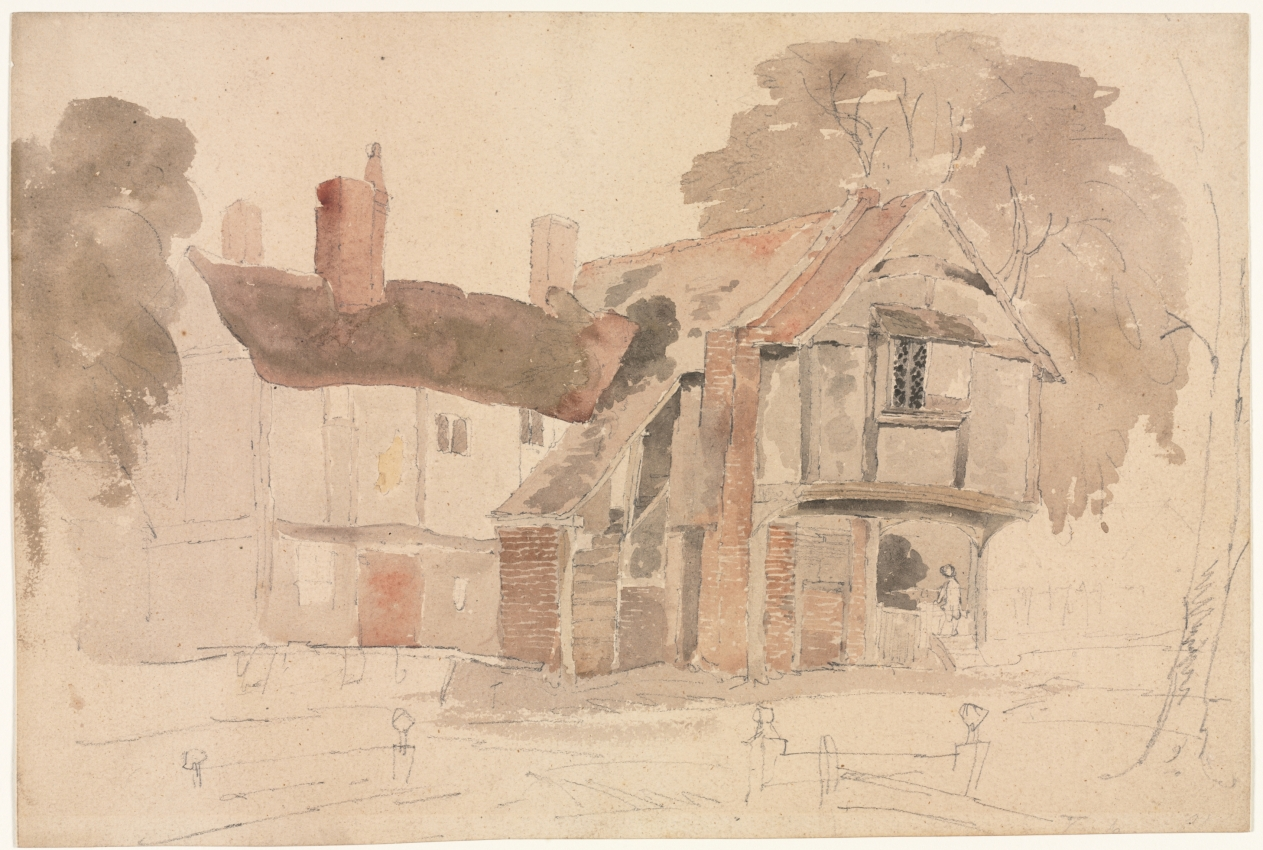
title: Bray Church Yard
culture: England, 19th century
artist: John Varley (British, 1778–1842)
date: 1807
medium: watercolor and graphite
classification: Drawing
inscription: inscribed, in graphite, on verso, at lower left: BrayChurch Yard - 1807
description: The inscription on the reverse of this drawing, "Bray Church Yard-1807," likely refers to St. Michael’s, the parish church in the village of Bray on the banks of the Thames in the county of Berkshire. The banks of the lower Thames Valley provided the subject matter for many of John Varley’s early watercolors. His pursuit of the picturesque led the artist to turn his back on London and its connotations of commerce and industry, focusing instead on the rural aspects of the scene.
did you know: Although rare, John Varley's early watercolors are considered his most inspired work.